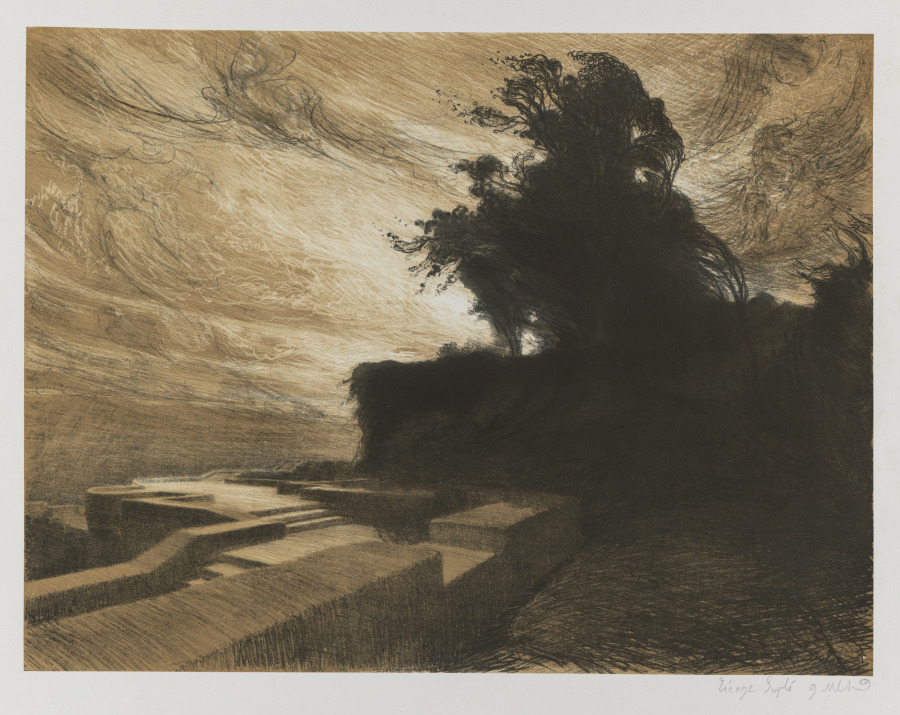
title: Hymn to Creation: Holy Spirit of God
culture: France, 19th century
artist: Charles Marie Dulac (French, 1865–1898)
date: 1894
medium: color lithograph on chine collé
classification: Print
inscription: In stone, lower right: Ch. Dulac; inscribed lower right margin in pencil: Tirage Suple; signed Charles Dulac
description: In his portfolio of eight enigmatic color lithographs, Hymn to Creation, Charles Dulac described canals, pools, forests, and storm-tossed trees in a highly personal, visual language. He concentrated on mood rather than on detail, taking the Symbolist liberty of idealizing nature without deforming it. Rather than capturing the fleeting effects of light or weather, as the Impressionists did, Dulac focused instead on momentary emotions. His landscape is a landscape of the mind.